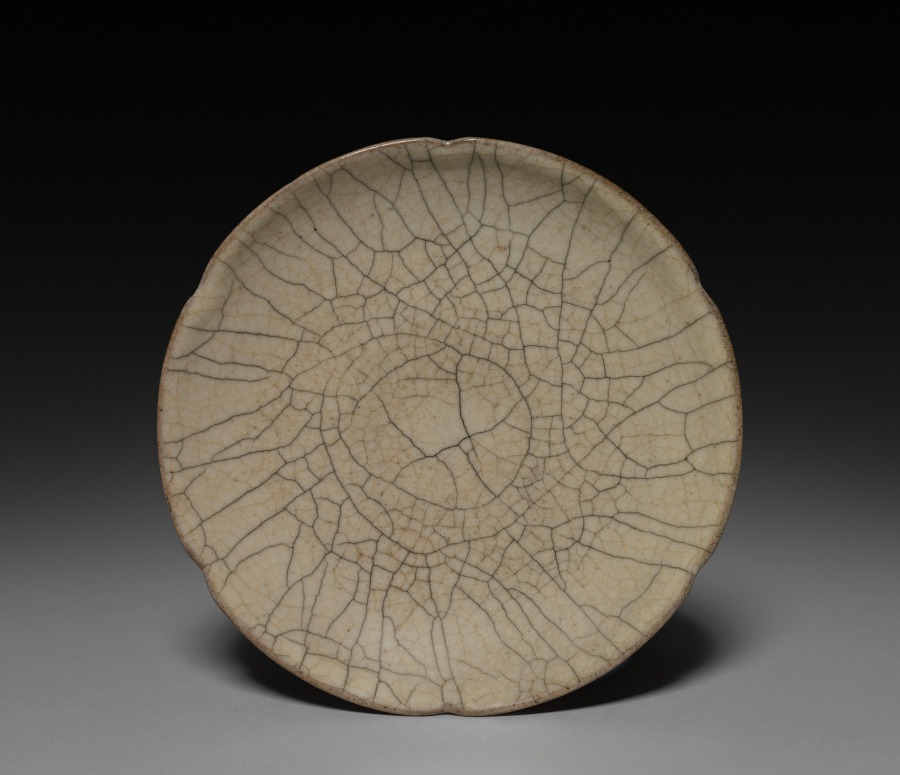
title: Lobed Dish: Guan ware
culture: China, Zhejiang province, Southern Song Dynasty (1127-1279) - Yuan Dynasty (1271-1368)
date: 12th-14th Century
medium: glazed buff stoneware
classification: Ceramic